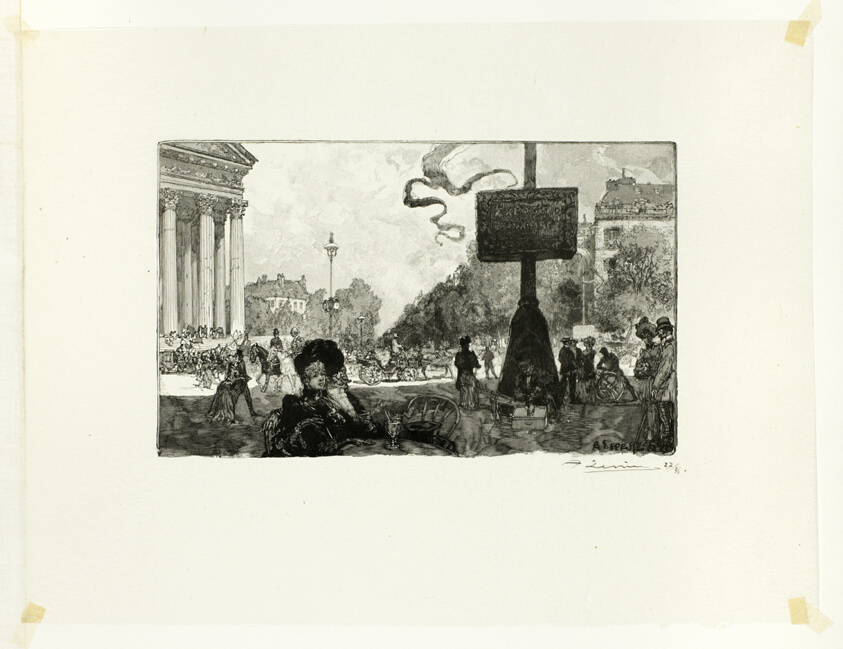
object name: Print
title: Corner of the Rue Royale, plate sixteen from Le Long de la Seine et des Boulevards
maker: Louis Auguste Lepère (French, 1849-1918); published by A. Desmoulins (French, active c. 1908-1910)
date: 1890, published 1910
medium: Wood engraving in black on cream Japanese tissue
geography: France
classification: wood engraving; paper; print; prints and drawing